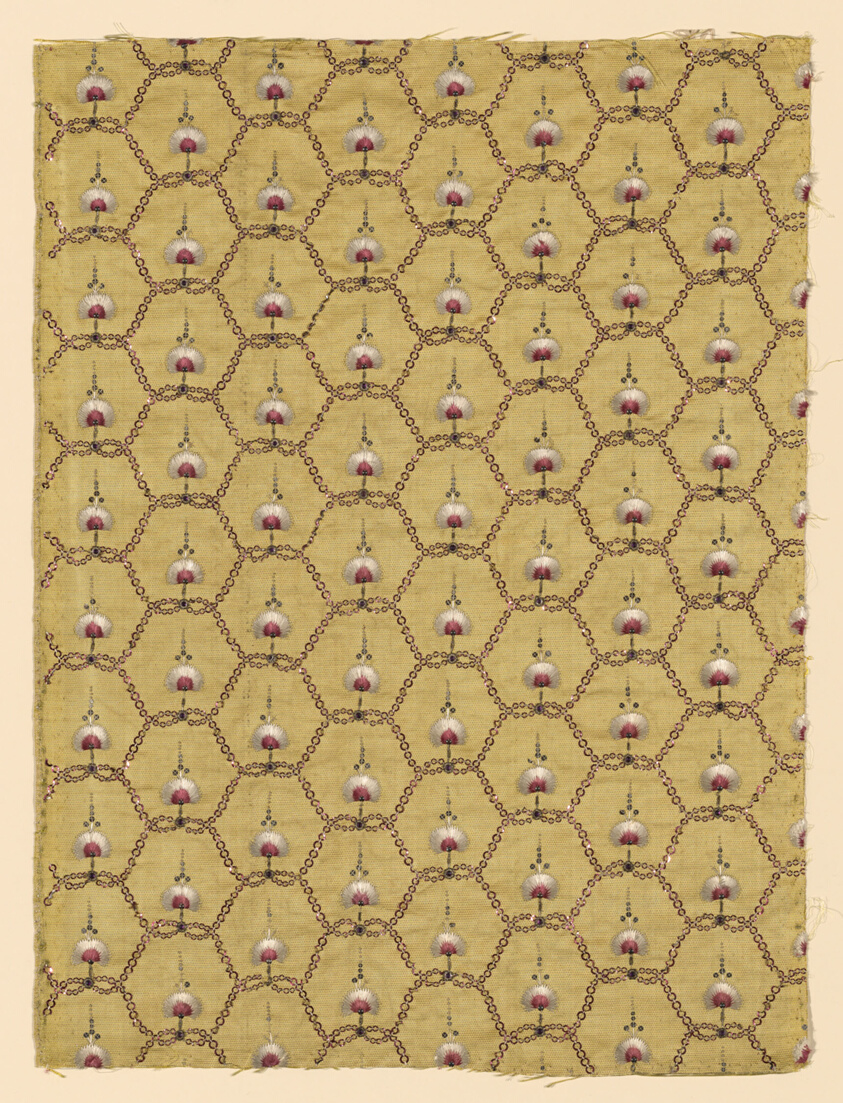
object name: Textile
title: Panel (Dress Fabric)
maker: France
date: 1775/80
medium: Silk, plain weave with silvered-metal-strip-wrapped with silk supplementary facing wefts; embroidered with silk and silvered-metal-strip and wire purl in satin stitches; couching; embellished with silvered and colored metal spangles; semiprecious stones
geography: France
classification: textile; needlework (visual works)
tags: flowers